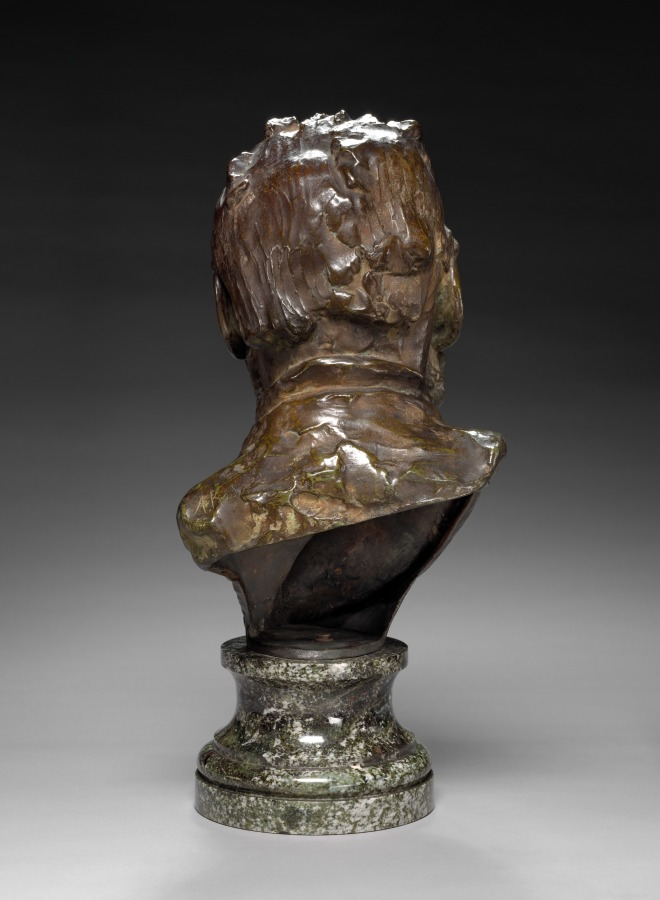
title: Bust of Victor Hugo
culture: France, 19th century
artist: Auguste Rodin (French, 1840–1917)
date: 1883 modeled; cast by 1917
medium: bronze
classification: Sculpture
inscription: inscribed on back: "A. Rodin" signed "Rodin" (back, lower left)